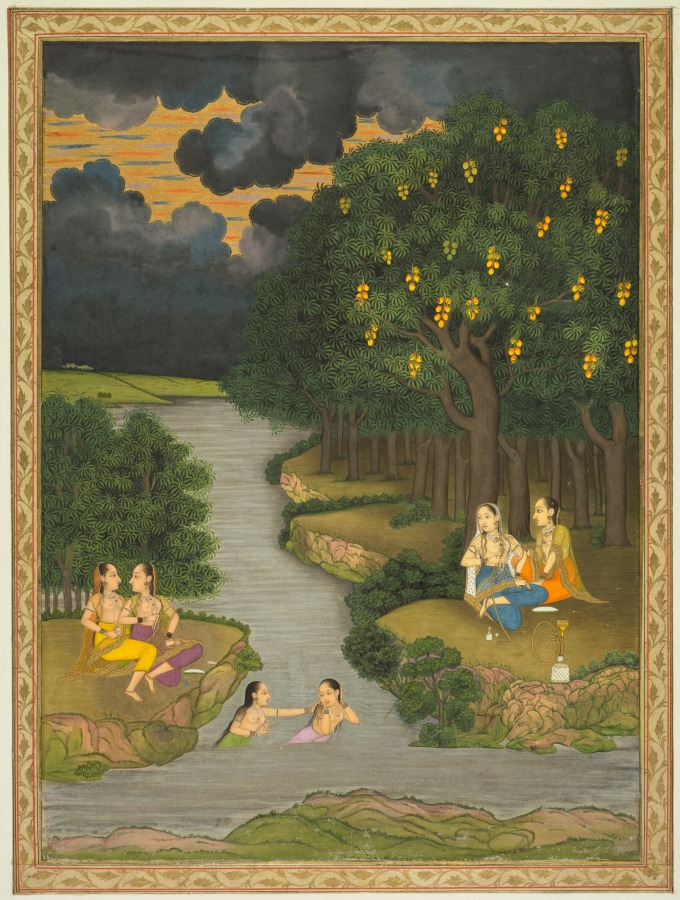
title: Women enjoying the river at the forest’s edge (recto) and flowering marigold (verso)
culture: India, Murshidabad or Lucknow, Mughal, 18th century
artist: style of Hunhar II (Indian, active mid-1700s)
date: c. 1765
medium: Gum tempera and gold on paper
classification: Painting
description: The image of young women at play, in association with water and the fruiting of trees, such as this mango, has been used in Indian art to signal the idea of prosperity and abundance. Rain clouds approach that will nourish the land. The pairs of women on the banks sample perfumes, and in front of them bowls made of leaves appear to hold jasmine flowers for adorning the hair. One woman smokes a hookah and looks on as two companions frolic in the rivulet. The palace’s white marble buildings are barely indicated in the far distance.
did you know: Mangoes are in varying stages of ripeness, from green to bright orange-yellow.